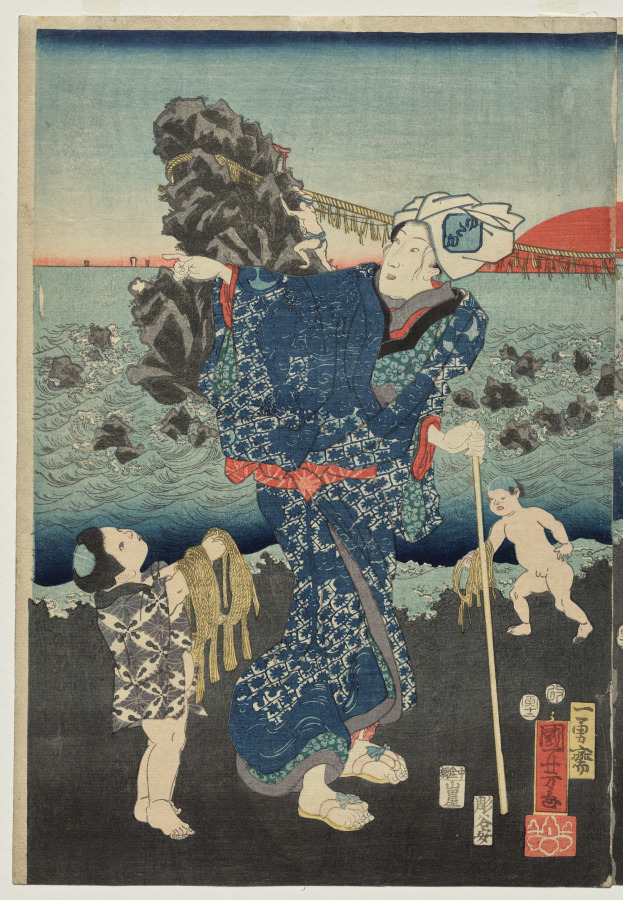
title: Splendid View at Futamigaura Bay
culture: Japan, Edo period (1615–1868)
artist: Utagawa Kuniyoshi (Japanese, 1797–1861)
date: 1854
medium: Left print from a triptych of color woodblock prints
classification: Print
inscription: Signature: Ichiyusai Kuniyoshi ga. Artist Seal: Paulownia. Publisher: Yamadaya Shohei (Nakabashi, emblem). Engraver: Hori Taniyasu. Censorship Seal: aratame.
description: This is one of three prints forming a continuous scene of figures visiting Futamigaura Bay near Ise Grand Shrine, one of Japan’s most sacred places. In the background, the sun rises between the “Wedded Rocks” joined by a twisted rope, called a shimenawa, used to designate a sanctified space. The rocks mark the entrance to Futami Okitama Shrine and are said to be embodiments of Izanagi and Izanami, the gods who, according to myth, created Japan. Futamigaura was a place where pilgrims purified themselves before visiting Ise and often lodged afterwards.